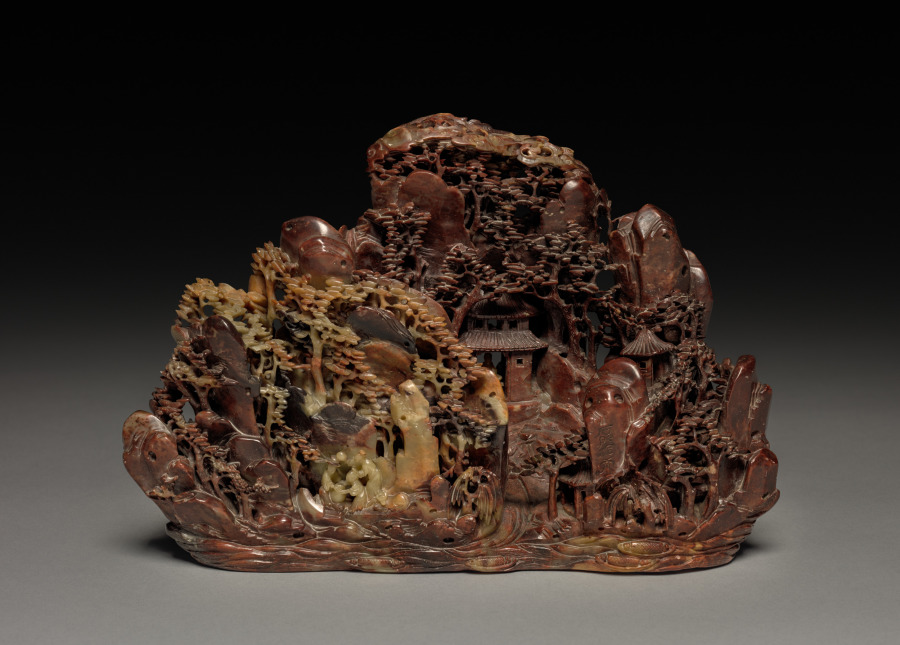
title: Landscape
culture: China, Qing dynasty (1644-1911)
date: 1644–1911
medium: soapstone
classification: Stone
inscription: 石門洞天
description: A mountain scenery surrounded by water and fish is meticulously carved out of soapstone, with a pond, bridge, waterfall, and temple front in its center. The unidentified figure scene on the left includes an ox and a man wearing what appears to be a Korean hat. A Buddha figure hidden in the depth of the temple can be glimpsed from the backside. The inscribed pillar on the right reads “Stonegate Cave to Heaven (shimen dongtian)”. Indentations all over the stone suggest that the miniature mountain was once adorned with precious stones and metal, presumably representing an earthly paradise to which one could escape in one’s mind and imagination.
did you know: A waterfall plummets down the cliff by the temple and then flows smoothly down to join the river at the front of the landscape scene.